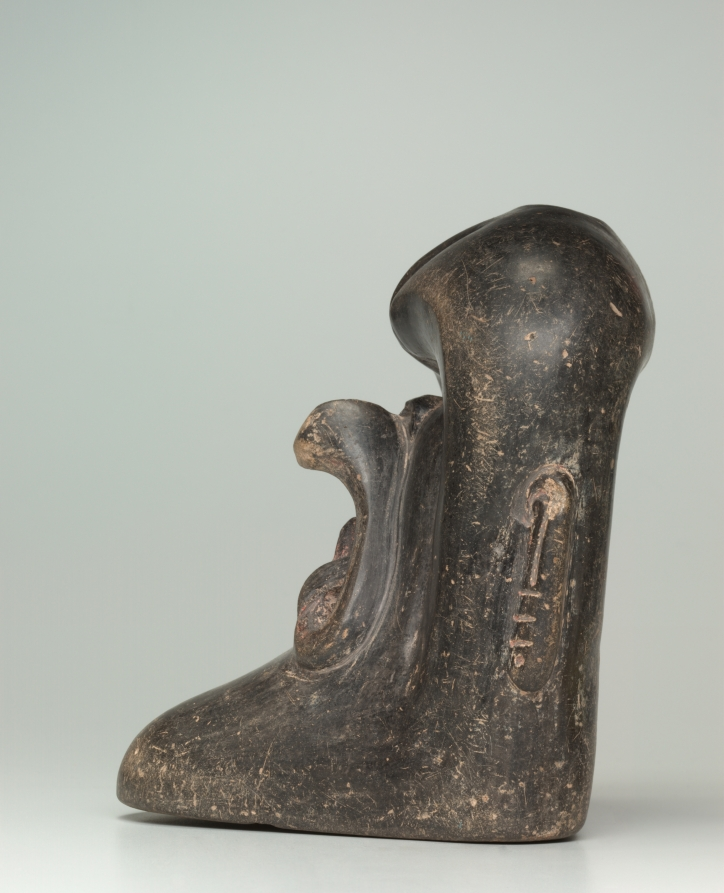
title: Vessel with Deity Mask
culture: Central Mexico (Las Bocas, Puebla?), Olmec, Formative Period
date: 1200–900 BCE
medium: ceramic, traces of pigment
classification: Ceramic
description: This unusual vessel is made of a U-shaped container and a sheet of clay modeled as a deity mask that is startling in its power: pierced eyes glare from the shadow of a muscular brow; the chin juts aggressively; and the part-bird, part-jaguar mouth opens in a shriek. This may be the face of the Olmec rain deity, the inspiration for much Olmec ritual and many accomplished works of art. The vessel may come from a grave or a buried offering.